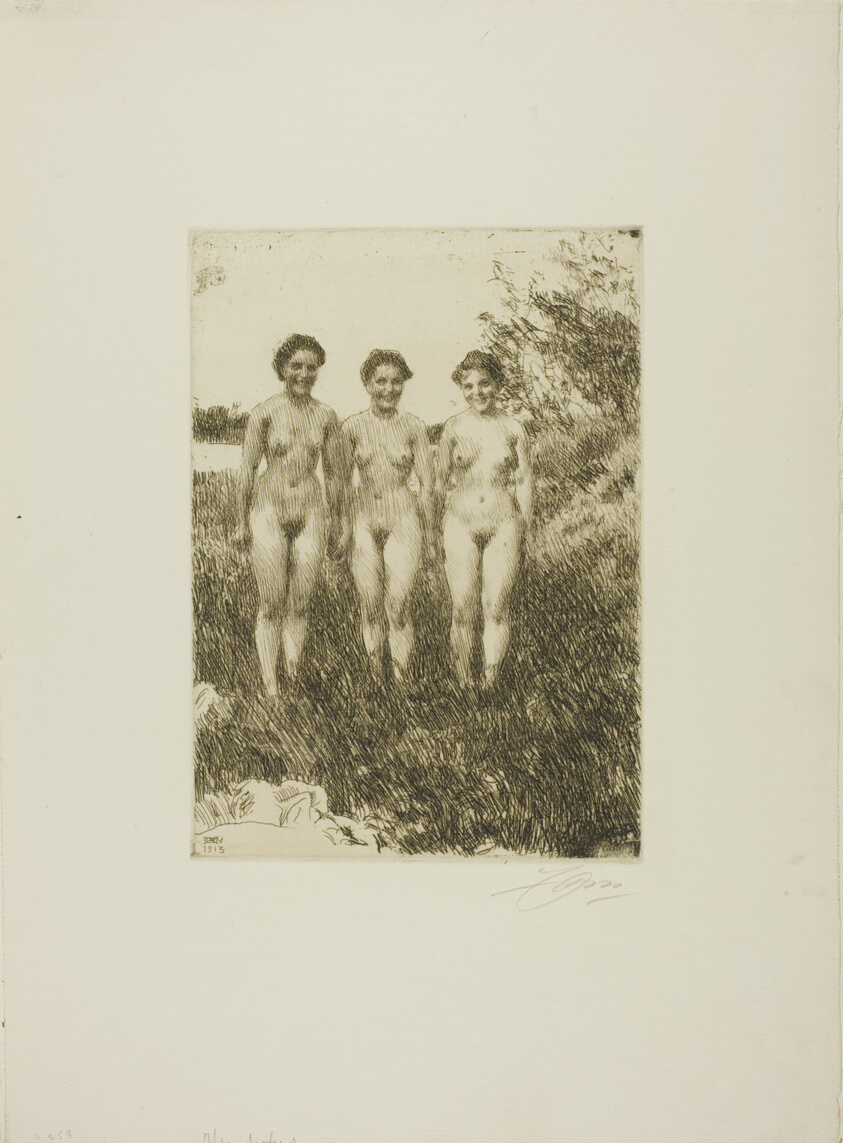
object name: Print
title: Three Sisters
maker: Anders Zorn (Swedish, 1860-1920)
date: 1913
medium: Etching on ivory laid paper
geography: Sweden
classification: etching; print; prints and drawing